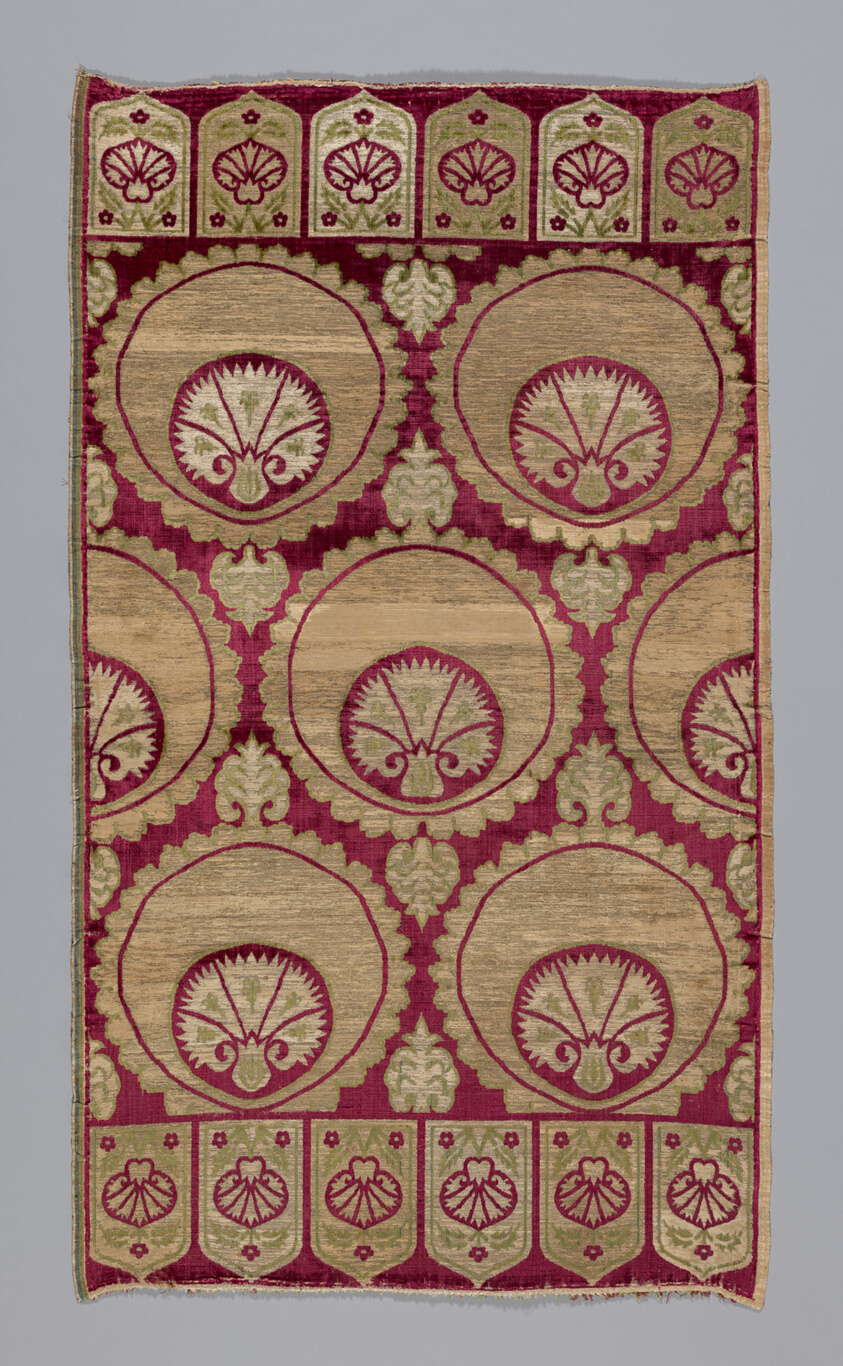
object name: Textile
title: Cushion Cover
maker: Turkey, Bursa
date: 1575/1625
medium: Silk, cotton, “silver” metal strips wrapped around a silk core, warp-float faced satin weave with “silver” supplementary metal-wrapped silk brocading wefts, supplementary binding wefts, and supplementary warps forming cut and voided velvet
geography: Turkey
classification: textile; weaving - velvet